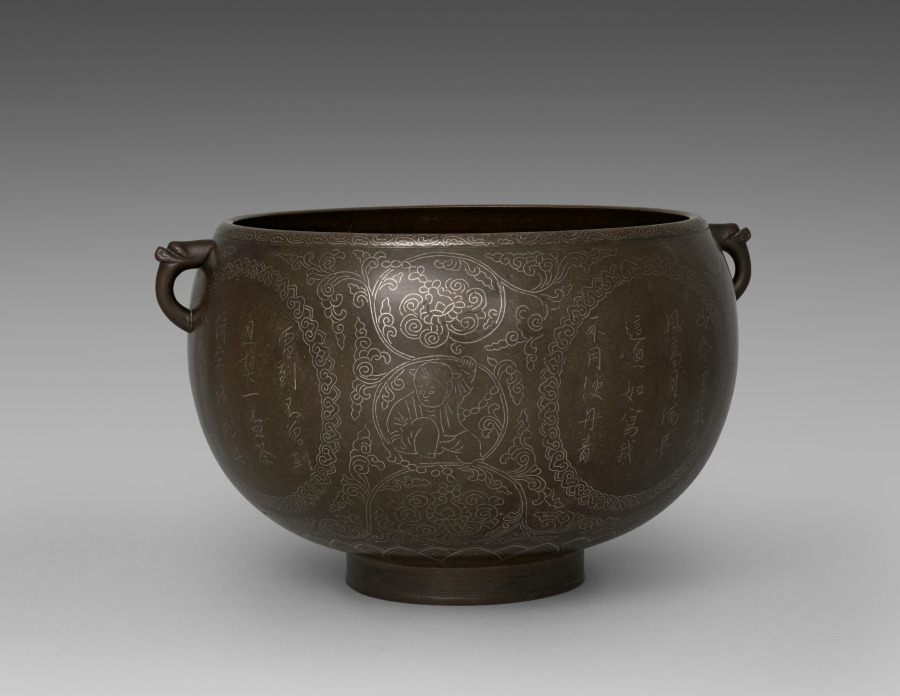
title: Basin with Inscribed Figures and Calligraphy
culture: Korea, Goryeo dynasty (918–1392)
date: 1100s–1200s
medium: bronze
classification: Metalwork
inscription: Each of the three roundels contain five-character, four-line poems with Buddhist messages.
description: This bronze basin may have been used for containing purified water. What makes this work charming is its intricate decoration done in silver inlay: the five-character, four-line poems interspersed among images of a child. The poems, which evoke the concept of nonattachment and nonduality, were written by Buddhist monks.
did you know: A child, one of the main decorative elements for this basin, is possibly a young Buddhist pilgrim named Sudhana, who took a long spiritual journey to search for enlightenment.